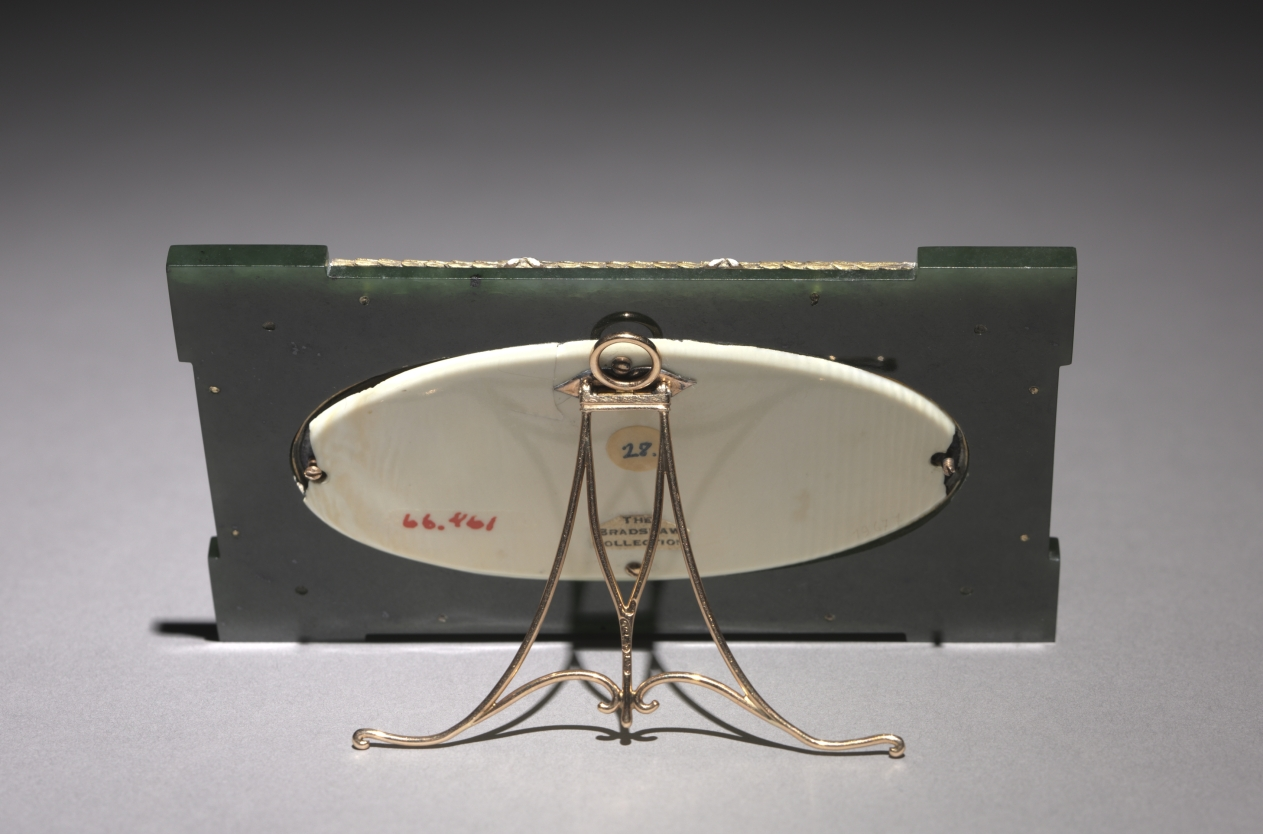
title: Framed Miniature of Hampton Court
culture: Russia, St. Petersburg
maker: House of Fabergé (Russian, 1842–1918)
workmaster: Henrik Wigström (Russian, 1862–1923)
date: c. 1905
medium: jade, gold, enamel, ivory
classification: Miscellaneous